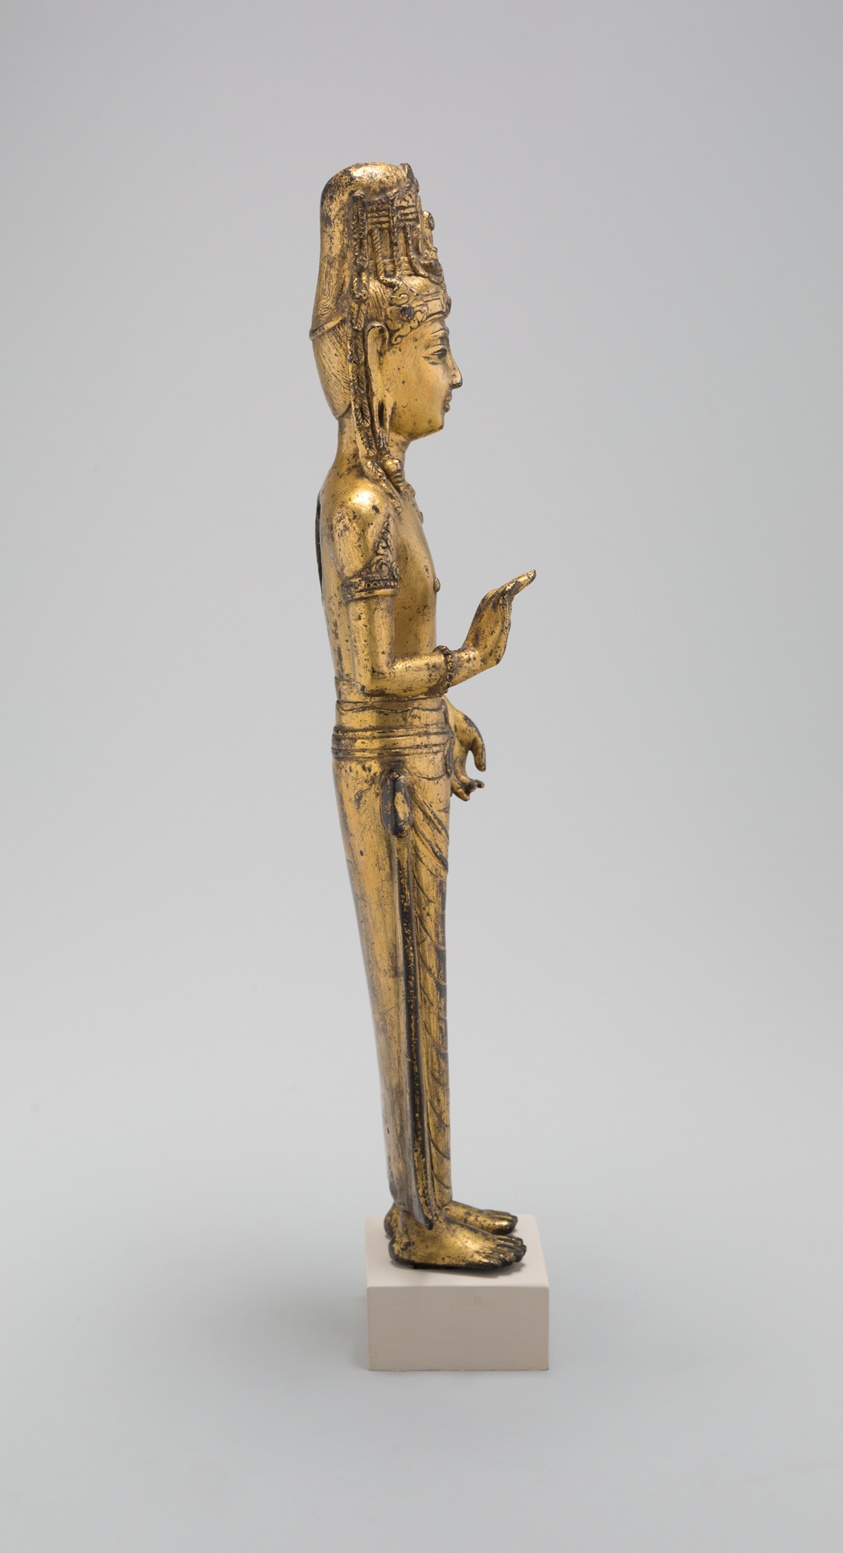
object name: Sculpture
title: Guanyin (Avalokiteshvara)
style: Chinese (culture or style)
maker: China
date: Dali kingdom (c. 937–1253), 12th century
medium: Gilt copper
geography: China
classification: bronze; metal; sculpture; asian art